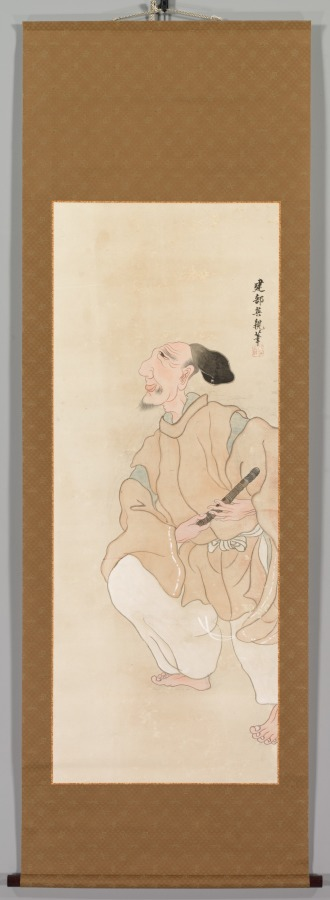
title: Genre Figures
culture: Japan, Edo period (1615–1868)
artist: Takebe Sōchō (Japanese, 1760–1814)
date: c. 1816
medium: hanging scroll; ink and color on paper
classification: Painting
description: Though rarely mentioned in official histories, Sōchō was an accomplished painter whose talent is readily apparent to the modern eye. For his compositions he chose traditional Japanese stories or everyday events. This scroll is part of a triptych of paintings converted from the folding screen format into the hanging scroll format.